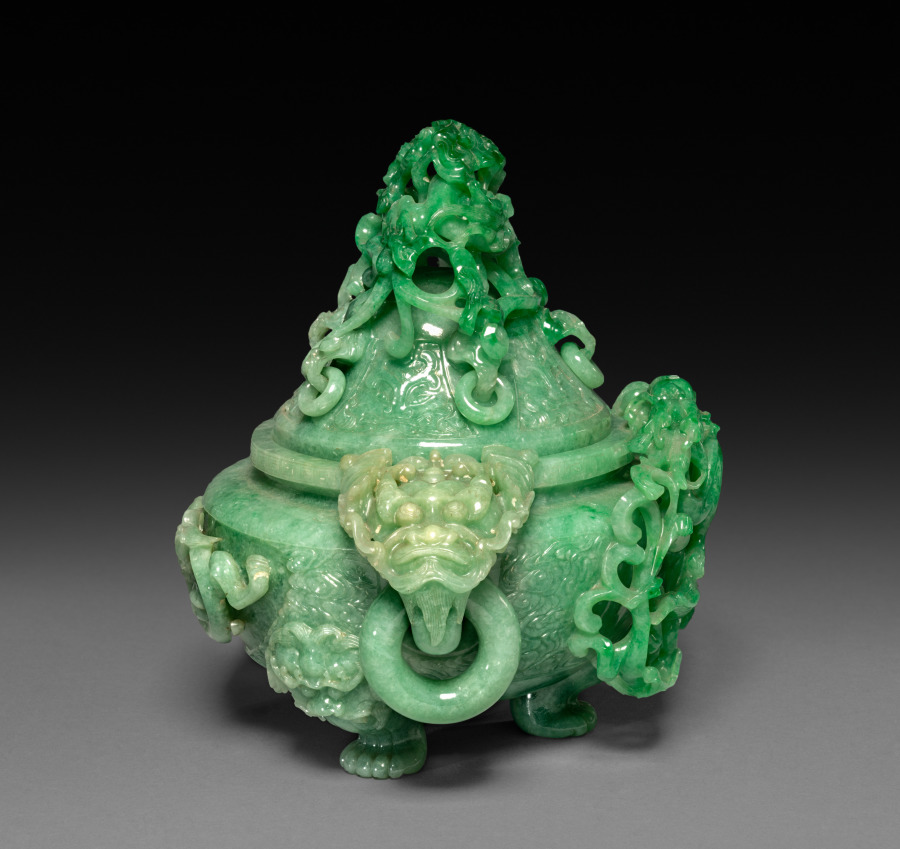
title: Three-Sectional Altar Group: Koro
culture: China, Qing dynasty (1644-1911)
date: 1644–1911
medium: jade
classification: Jade